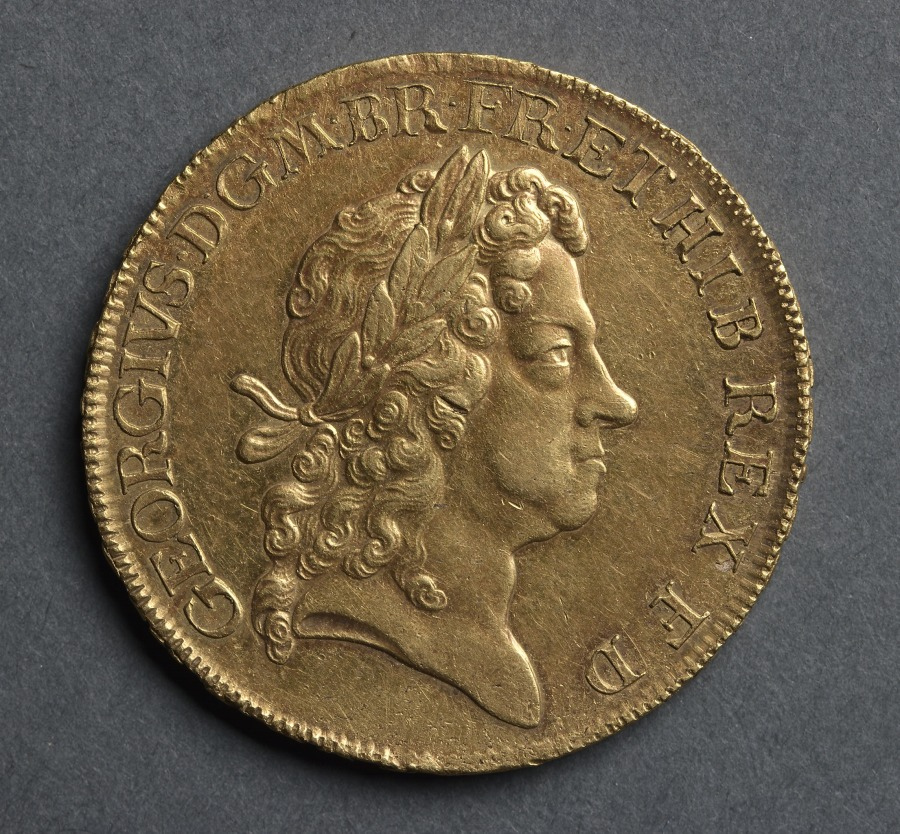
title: Five Guineas: George I (obverse); Shields and Star of the Order of the Garter (reverse)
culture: England, George I, 1714-1727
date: 1716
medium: gold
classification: Coins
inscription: GEORGIVS.D.G.M.BR.FR.ET.HIB.REX.F.D.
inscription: BRVN ET L DVX S R I A TH ET EL 1716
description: The Act of the Union of 1706 by Queen Anne added the arms of Scotland to those of England. The shields now read as England & Scotland, France, Ireland, and Hanover. Around the shields the many titles of the king are abbreviated to sometimes only one letter: BRVN ET·L·DVX S·I·R·A·TH ET·EL Duke of Brunswick and Lueneburg, Arch Treasurer and Prince Elector of the Holy Roman Empire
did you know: In the center of the shields is the symbol of the Order of the Garter, an order of chivalry founded by Edward III of England in 1348.